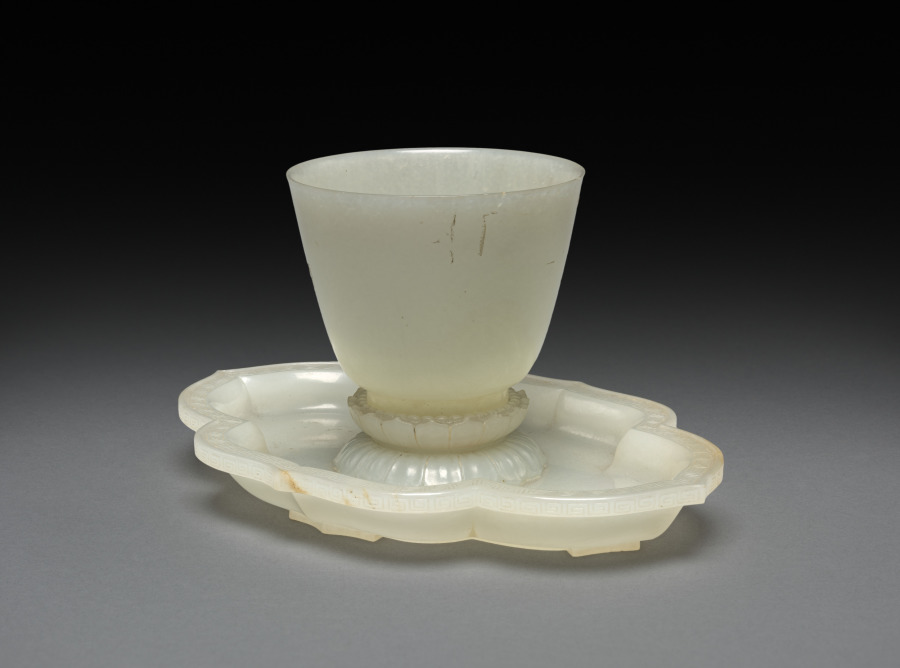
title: Lotus-shaped Dish and Cup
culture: China, Qing dynasty (1644–1911), Qianlong reign (1736–95)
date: 1736–95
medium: jade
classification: Jade